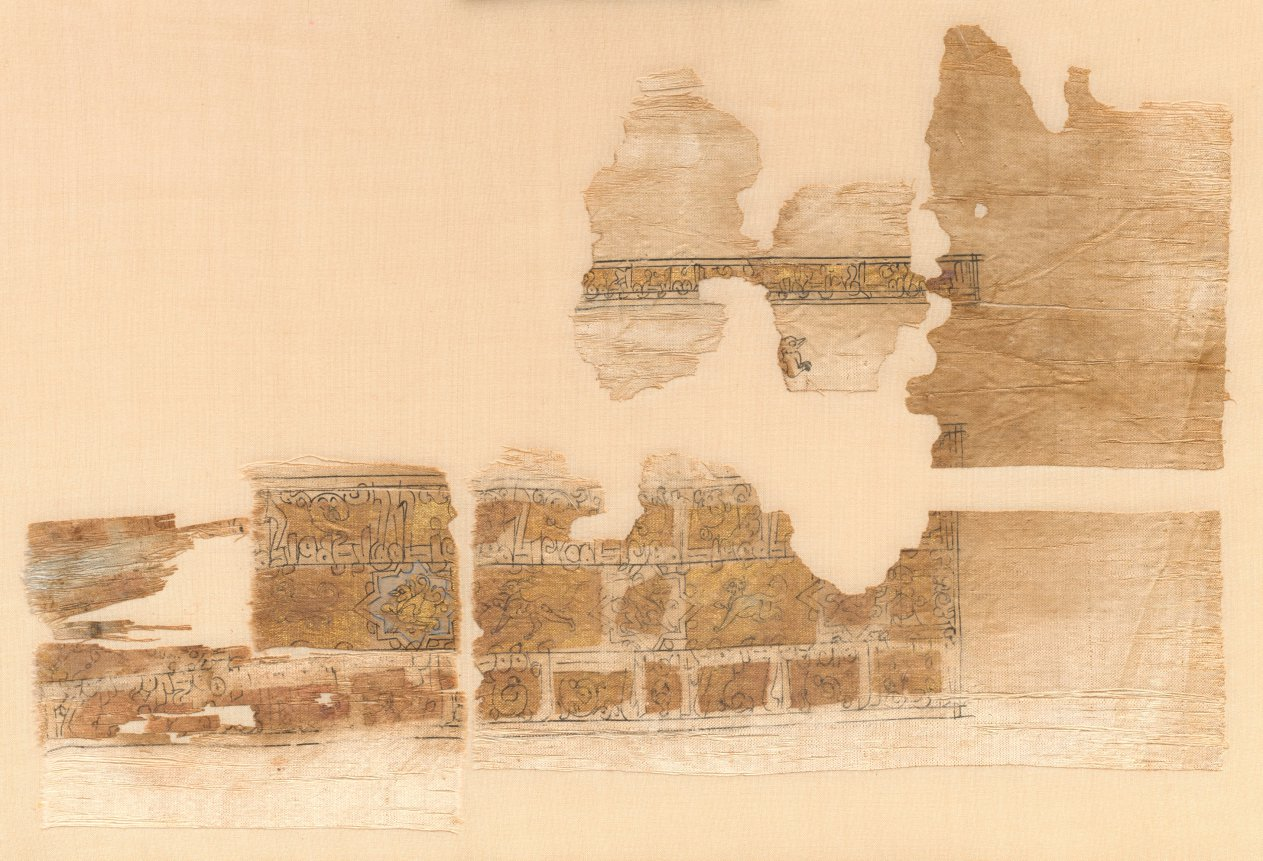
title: Fragment with tripartite band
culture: Iran or Iraq, Seljuq period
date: 1000s–1100s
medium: Silk warp and cotton weft (mulham): plain weave; gold leaf and ink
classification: Textile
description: This three-part band consists of two opposing bands of inscriptions flanking an ornamental band of winged griffins within eight-pointed stars, separated by various creatures—a rabbit, a cheetah, and possibly a sphinx. The inscriptions in the band are in simple Kufic against a floriated background. They, as well as the single band of inscription above, repeat in various combinations as benedictions, "endurance and good fortune, blessing, peace." The patches forming the background are gold, the design is drawn in black, and the background of only one star is blue. This textile probably reflects the international fashion or may have been made for export to Egypt, where this fragment likely survived.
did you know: Gold leaf was applied on mulham and decorated mostly likely with a stylus (pen) and ink drawing.